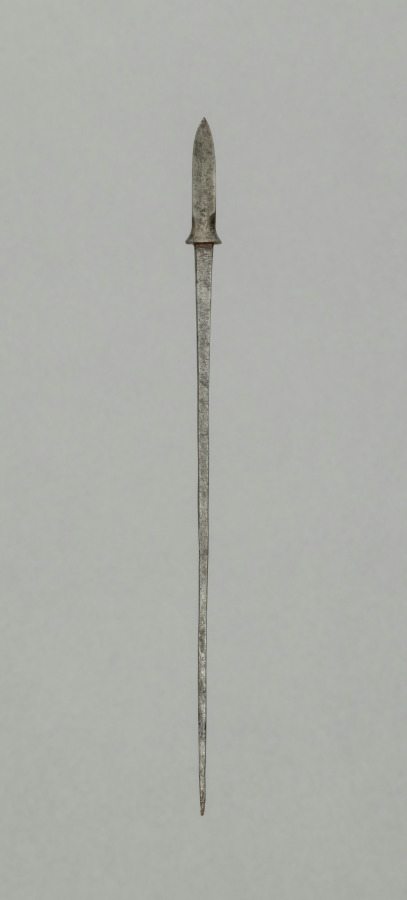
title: Arrow Point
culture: Japan, Edo period (1615–1868)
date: 1700s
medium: steel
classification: Arms and Armor